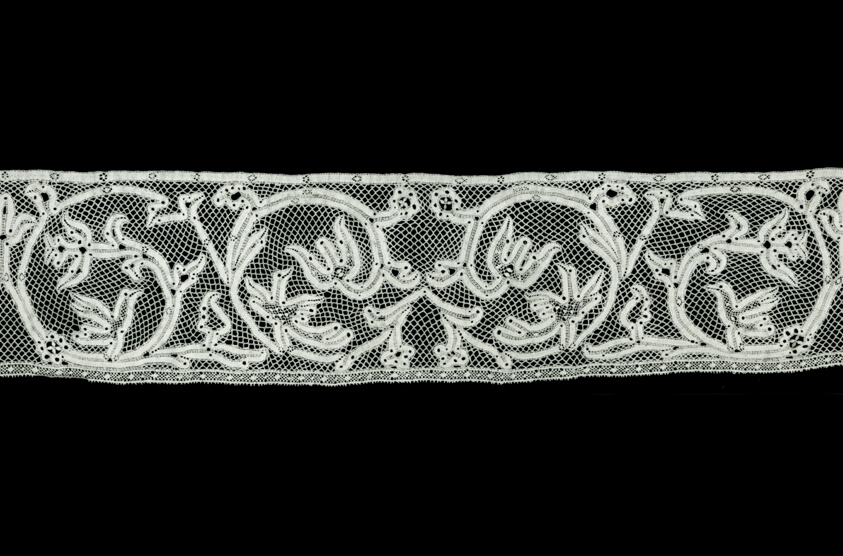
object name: Textile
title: Border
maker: Northern Italy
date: 1701/50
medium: Linen, bobbin part lace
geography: Northern Italy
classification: textile; lace - bobbin